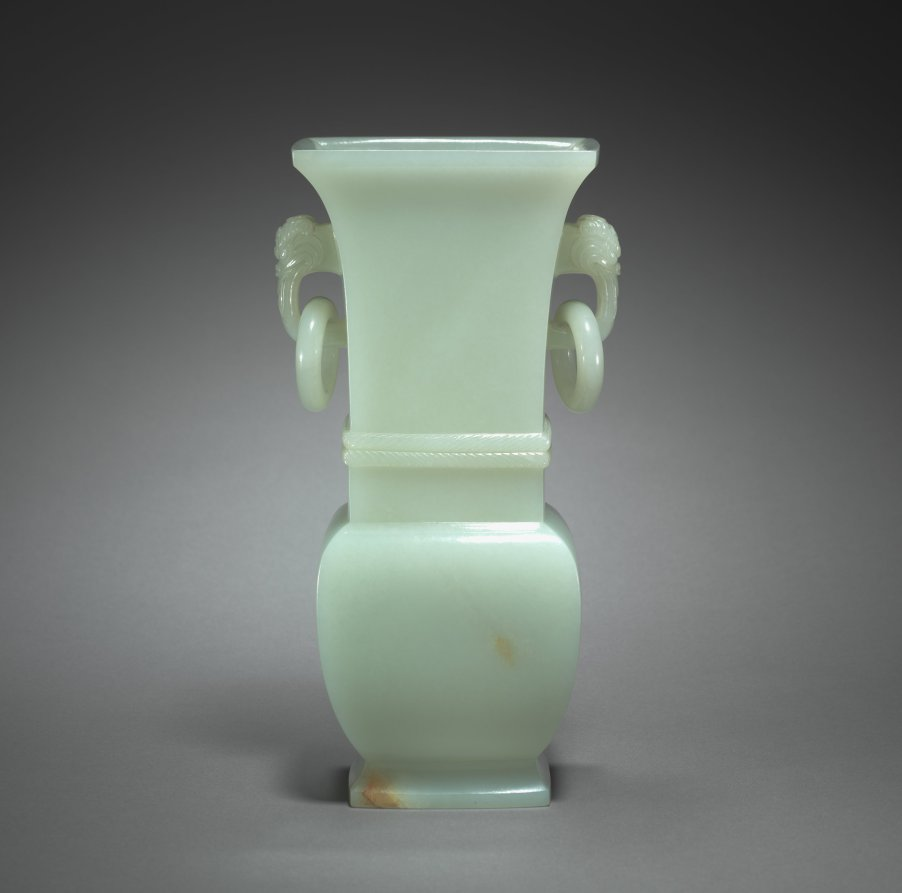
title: Vase in the Form of Archaic Hu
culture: China, Qing dynasty (1644–1911)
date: 1700s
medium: pale greenish-white jade with brown markings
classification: Jade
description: The square vase made entirely of jade imitates a ceramic or metal type with a corded string around its shoulder. Superbly carved are also the rings that hang loosely in handles held by feline animal heads.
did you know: Appreciated for its durability, hardness, luster, and subdued colors, jade was considered one of the most precious materials in China.